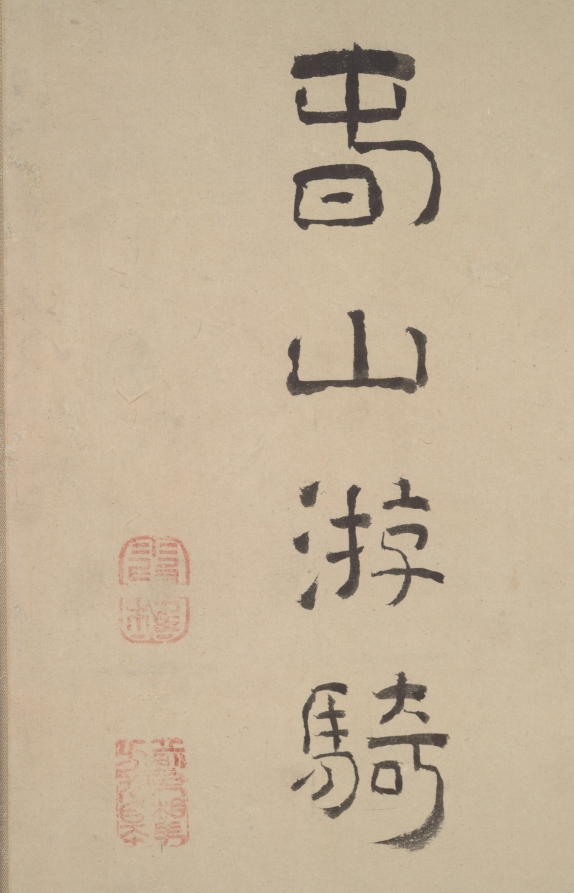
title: Spring Landscape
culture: Japan, Edo period (1615–1868)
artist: Ike Taiga (Japanese, 1723–1776)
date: 1700s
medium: hanging scroll; ink and color on paper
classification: Painting